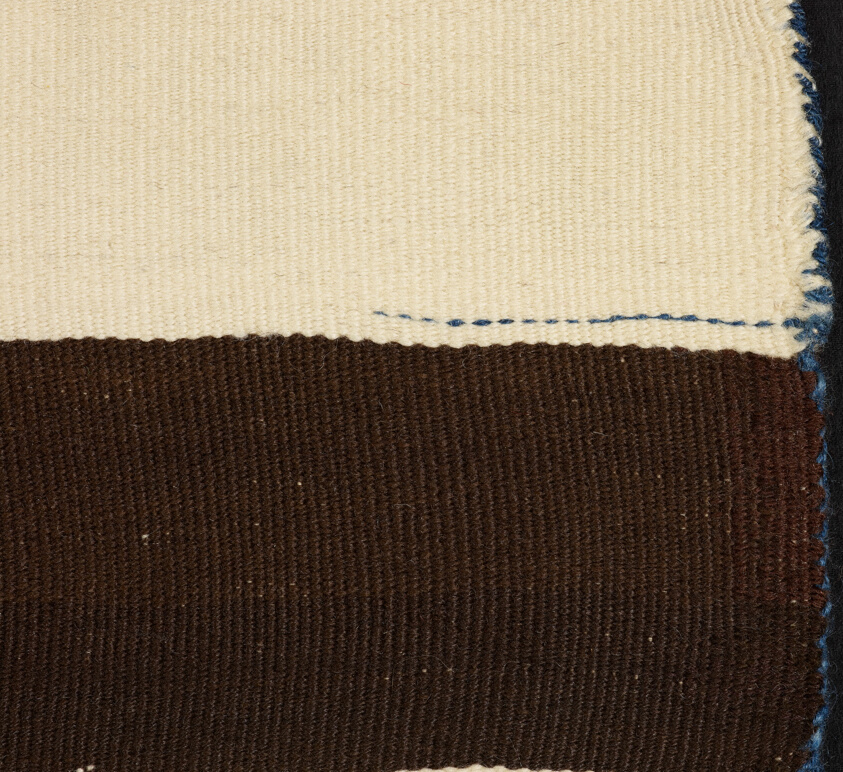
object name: Costume and Accessories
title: Wearing Blanket (Phase II)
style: navajo, americas, dine, 19th century, Arts of the Americas, indigenous, southwest, native american, north american, native north american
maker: Navajo (Diné) (Arizona, New Mexico, and Utah, United States)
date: 1850-65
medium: Wool; single interlocking tapestry weave; twined edges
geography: Navajo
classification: textile; blanket (covering); costume; garment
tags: geometric, arrow, squares, stripes